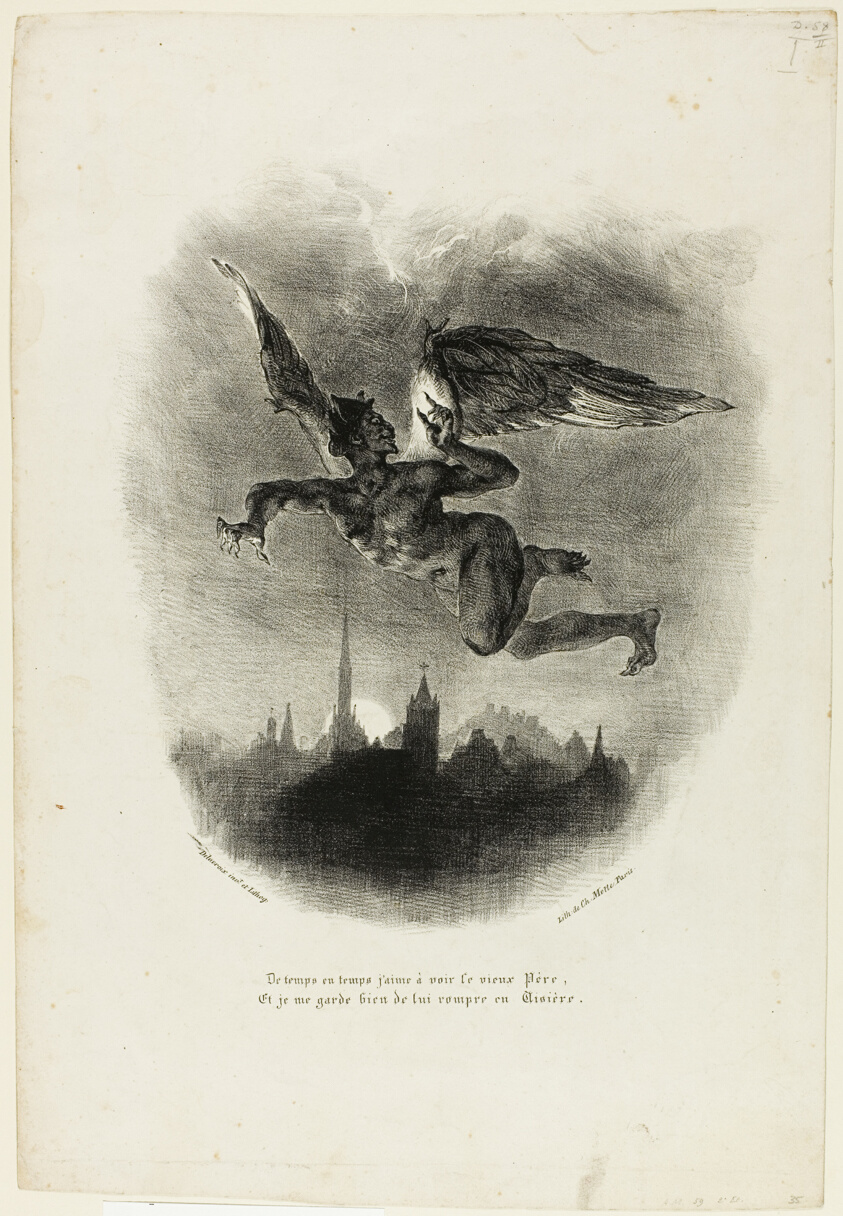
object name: Print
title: Mephistopheles Flying, from Faust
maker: Eugène Delacroix (French, 1798-1863)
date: 1828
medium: Lithograph in black on white wove paper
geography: France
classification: lithograph; print; prints and drawing